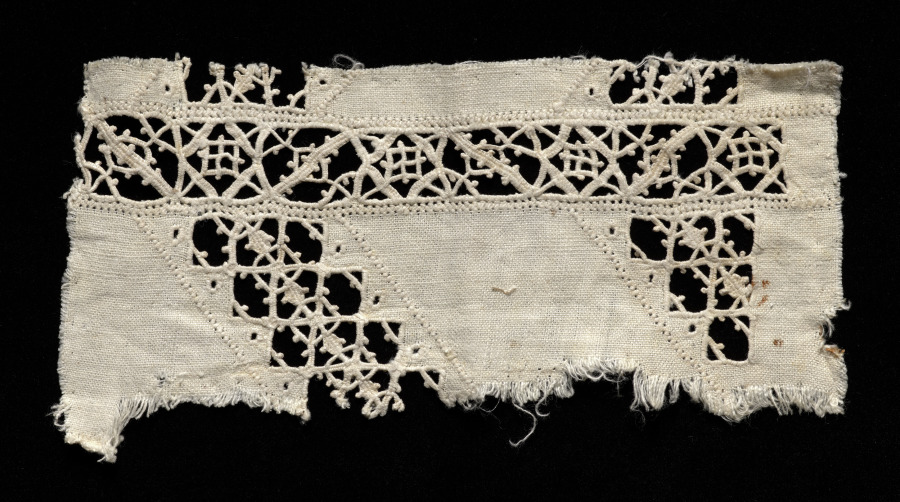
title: Lace Fragment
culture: Italy, 1600s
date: 1600s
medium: Linen: needle lace (cutwork and reticella)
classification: Lace